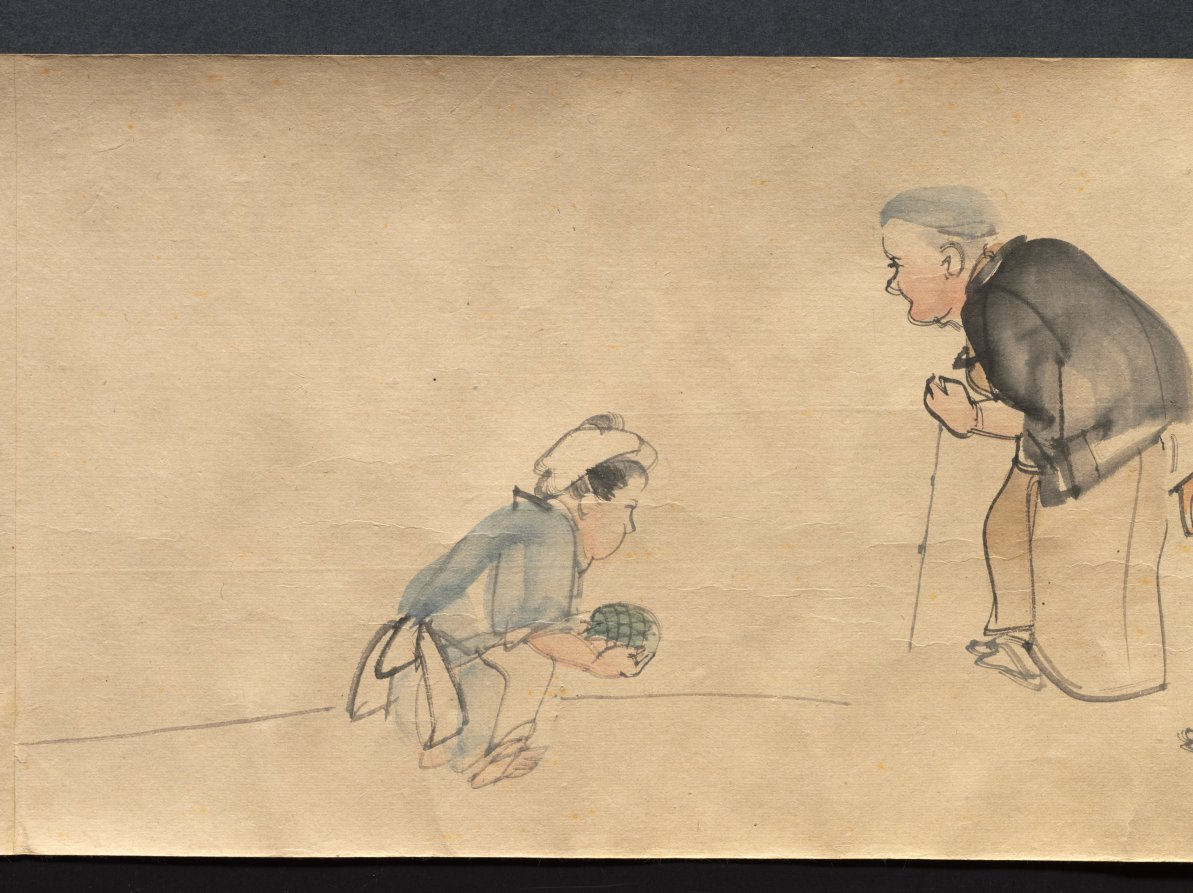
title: Festival Scenes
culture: Japan, Edo period (1615–1868)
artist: Suzuki Nanrei (Japanese, 1775–1844)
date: c. 1795–1844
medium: handscroll; ink and color on paper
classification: Painting